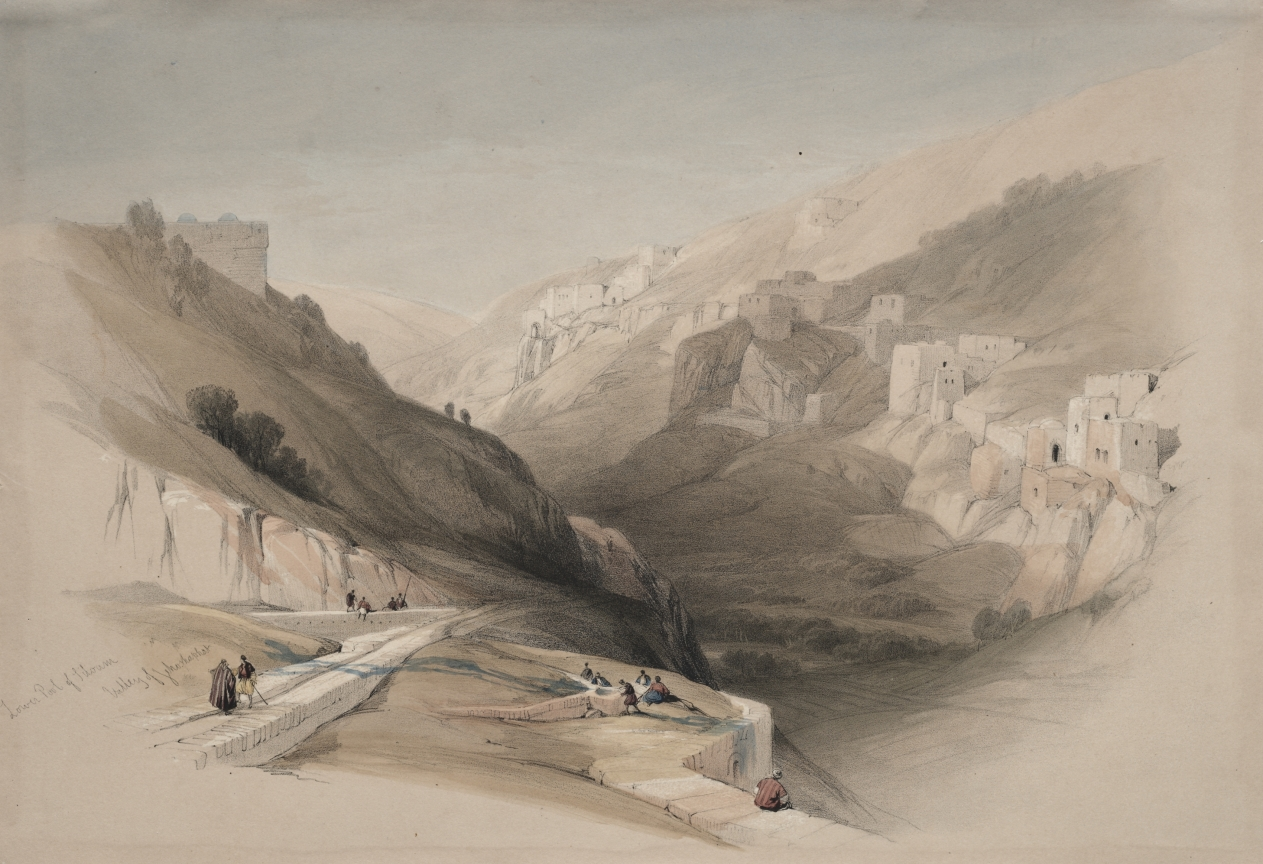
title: Lower Pool of Siloam, Valley of Jehoshaphat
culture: England, 19th century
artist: David Roberts (Scottish, 1796–1864)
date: 1839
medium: color lithograph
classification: Print